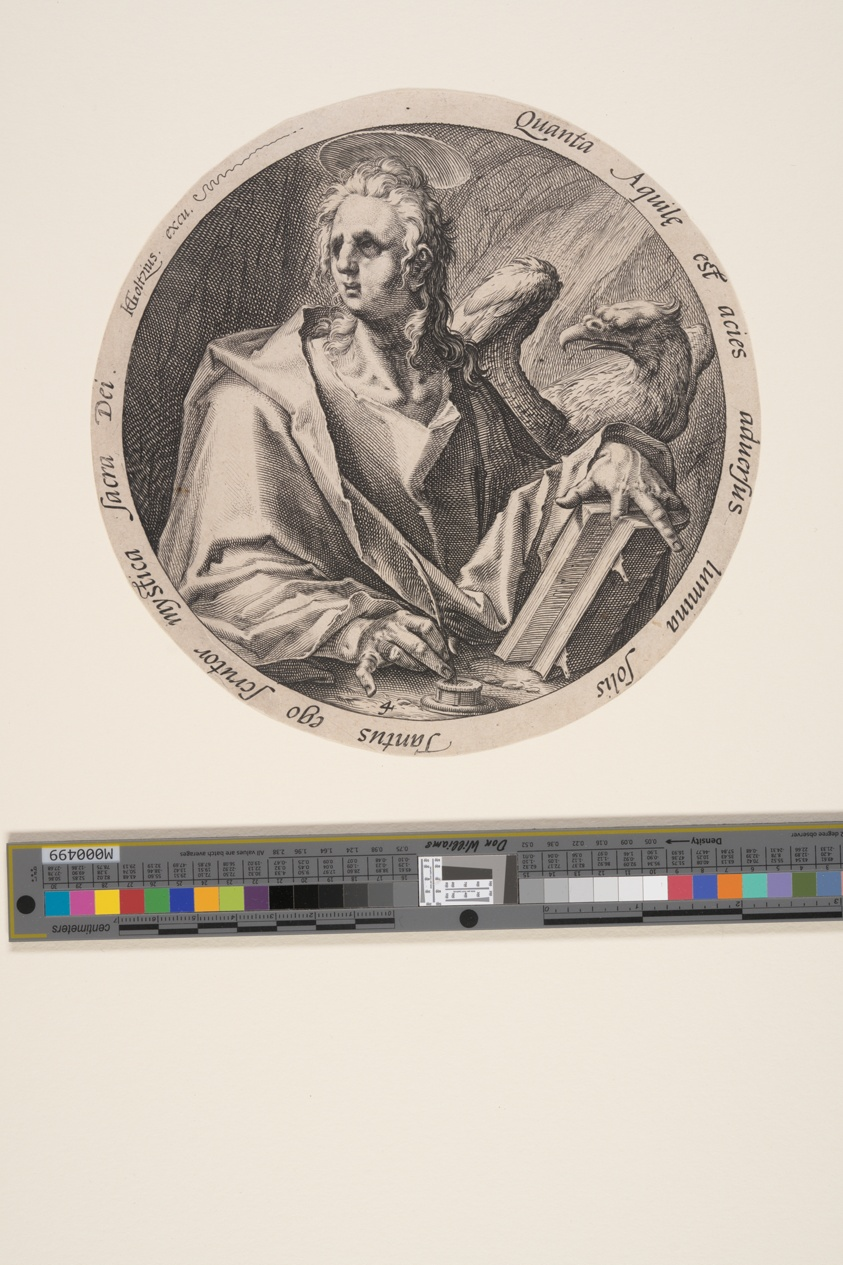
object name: Print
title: John, from The Evangelists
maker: Jacques de Gheyn II (Dutch, 1565–1629); after Hendrick Goltzius (Dutch, 1558–1617)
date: 1588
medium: Engraving on laid paper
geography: Netherlands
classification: engraving; paper; print; prints and drawing